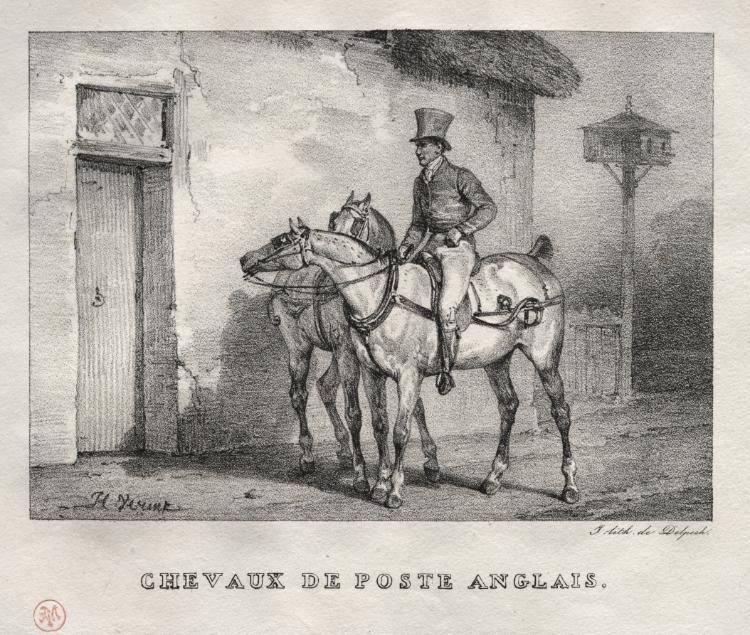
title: Postal Horses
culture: France, 19th century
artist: Horace Vernet (French, 1789–1863)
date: 1823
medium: lithograph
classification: Print